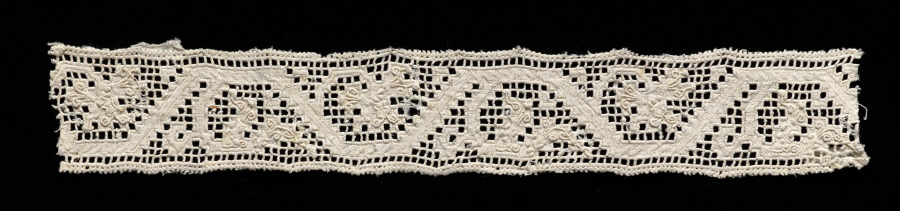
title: Lace fragment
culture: Italy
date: 1500s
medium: Linen: needle lace (drawnwork) insertion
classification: Lace